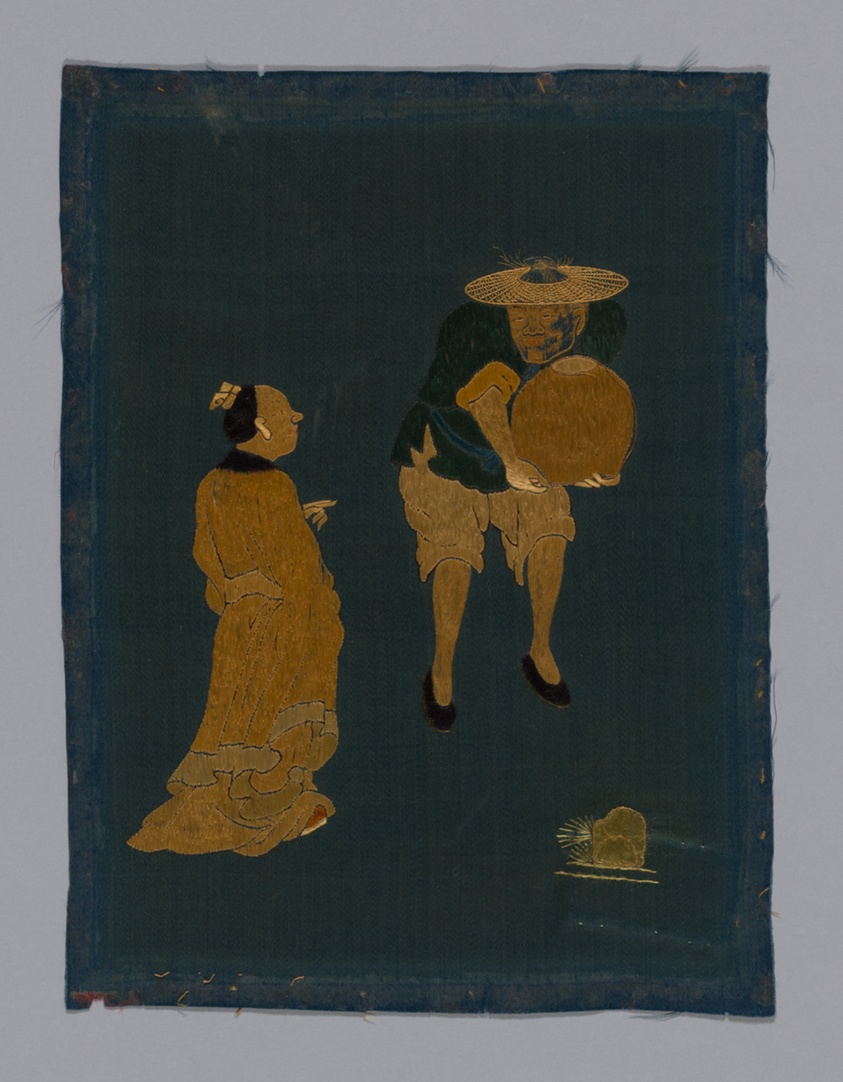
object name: Textile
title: Panel (Furnishing fabric)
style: kangxi, qing, East Asian, Chinese (culture or style), asian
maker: China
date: Kangxi Period, Qing dynasty (1644–1911), 1800/50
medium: One of four panels. Of dark green satin embroidered in colored silks. Has two panels of figures and one of flowers. Borders of modern red cloth with design of fret in couched gold cord.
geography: China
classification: needlework (visual works); weaving; textile; furnishing textile